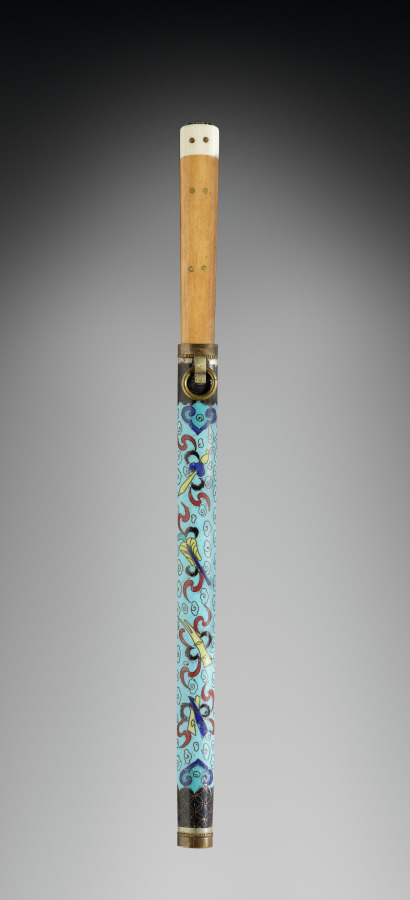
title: Chopstick and Knife Kit -Souvenir Trade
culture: Japan, Meiji period (1868–1912) to Taishō period (1912–26)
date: early 1900s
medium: enamel, wood, walrus ivory or bone, metal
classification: Implements